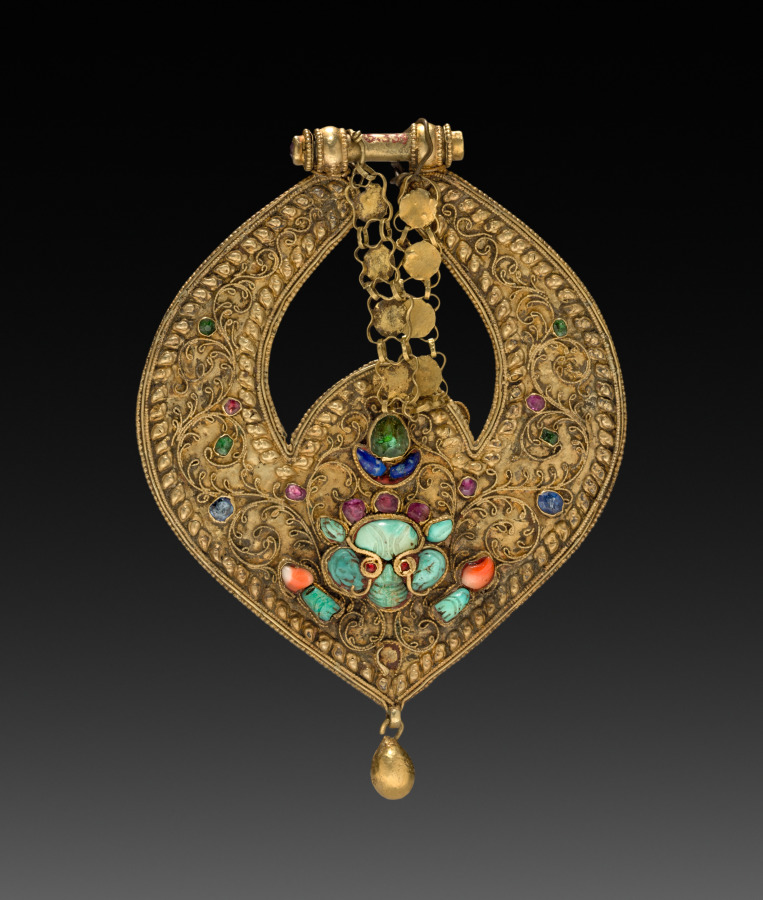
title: Deity Earring with Vishnu on Garuda (front) and chepu (monster mask) (back)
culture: Nepal, Kathmandu Valley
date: 1600s or 1700s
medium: Gold set with precious and semi-precious stones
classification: Jewelry